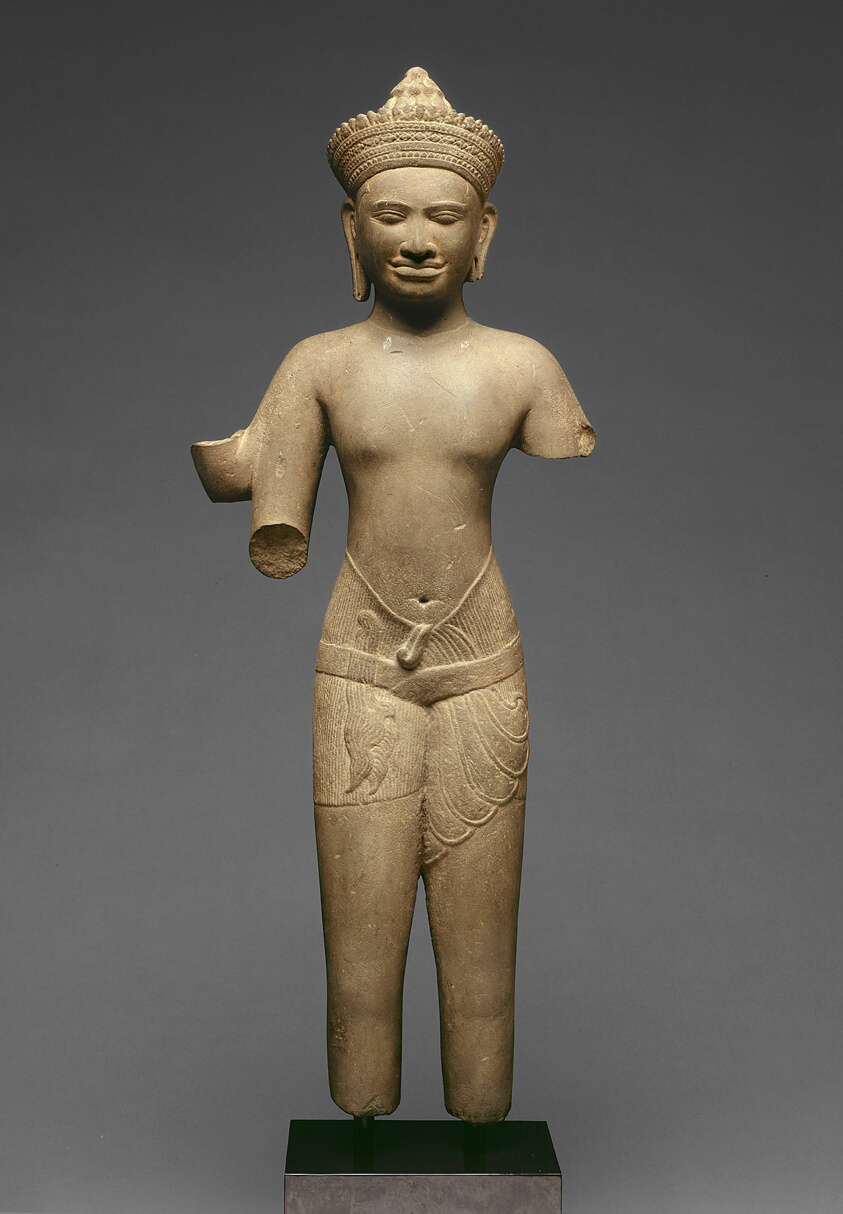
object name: Sculpture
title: God Vishnu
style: Southeast Asian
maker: Cambodia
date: Angkor period, 11th century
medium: Sandstone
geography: Cambodia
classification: sandstone; stone; sculpture; asian art